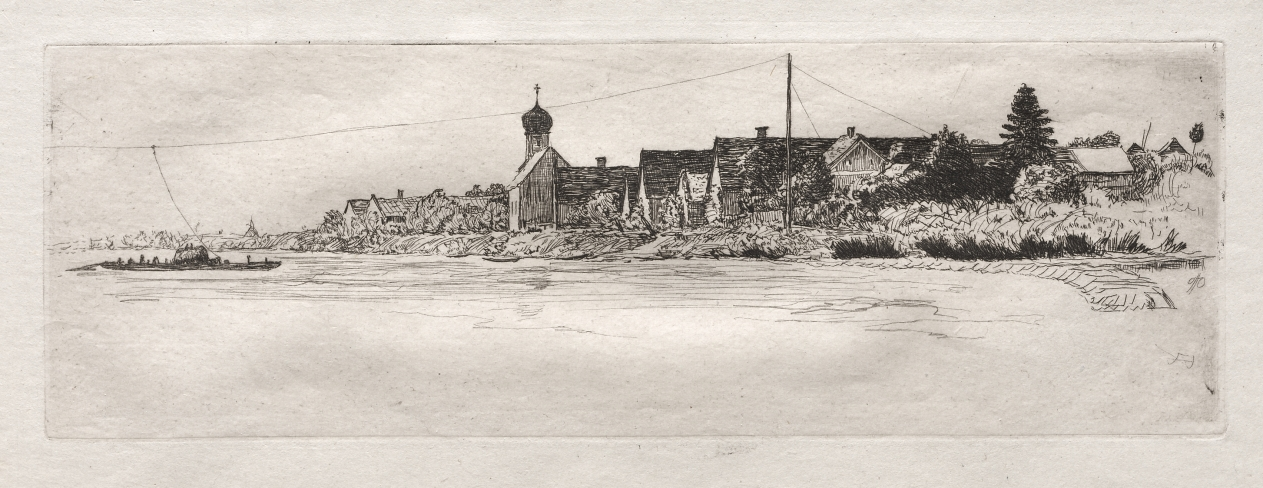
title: Ferry at Schwabel Weiss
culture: America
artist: Otto H. Bacher (American, 1856–1909)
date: 1879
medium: etching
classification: Print